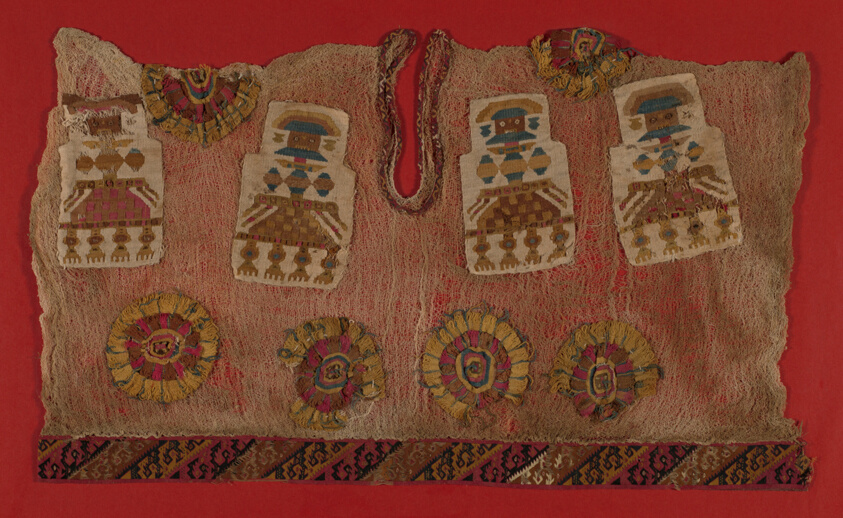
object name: Costume and Accessories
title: Tunic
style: lambayeque, pachacamac, middle horizon, Pre-Columbian, americas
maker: Lambayeque (North coast, Peru)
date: 1000/1476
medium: Cotton, open plain weave; appliquéd with small panels of cotton and wool (camelid), slit and single interlocking tapestry weave, and cotton and wool (camelid), slit tapestry weave medallions; edged in plain weave with extended weft fringe; cotton cord, embroidered with wool (camelid) in cross-knit loop stitches neck edging; cotton and wool (camelid), slit and single interlocking tapestry weave with eccentric and interlaced outlining wefts bottom band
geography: Peru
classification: textile; weaving; costume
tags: super/natural